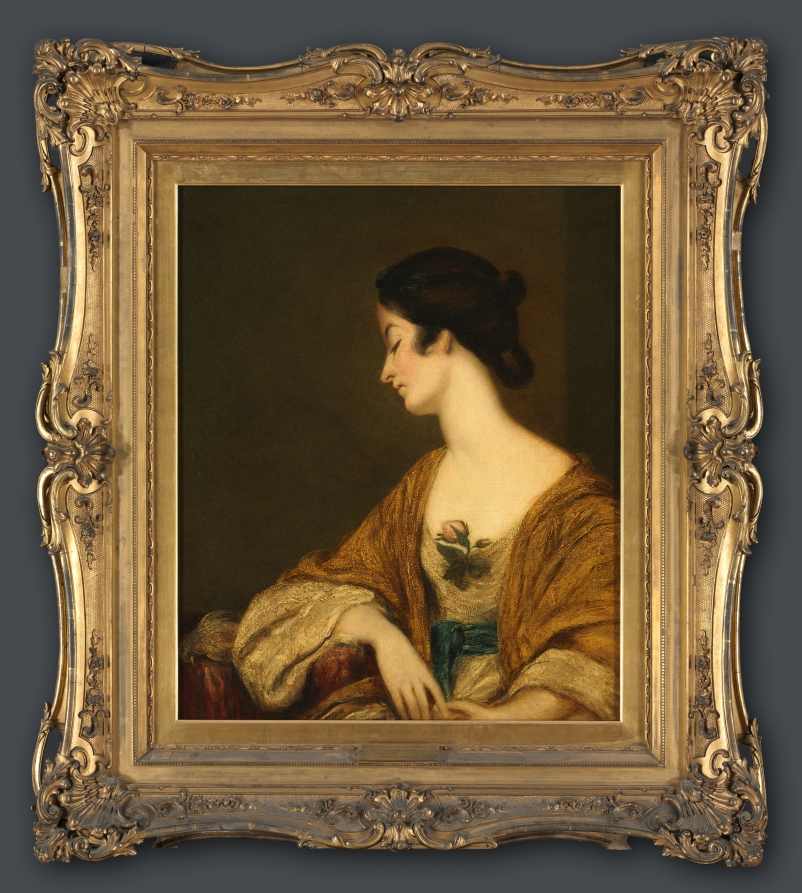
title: Portrait of Mrs. George Collier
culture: England, 18th century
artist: follower of Joshua Reynolds (British, 1723–1792)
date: 18th century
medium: oil on canvas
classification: Painting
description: Given to the Cleveland Museum in 1920 by the collector Jeptha H. Wade, this painting was thought to be an authentic work by Joshua Reynolds. However, after considerable study, the museum attributed it to a follower of Reynolds working in a similar style around the same time. This portrait depicts the wife of the captain (and later admiral) George Collier. The artist draws an analogy between this woman and Lesbia, a married woman who provided much artistic inspiration for the Roman poet Catullus (c. 84–c. 54 BC). The poet's writings document a love affair with Lesbia, and one poem in particular documents the death of the woman's beloved pet sparrow. The viewer can barely see the sparrow in this painting, since it lies on a table partially obscured by her right elbow. The muted colors evoke a sense of melancholy as the woman mourns with her head turned away from the viewer.